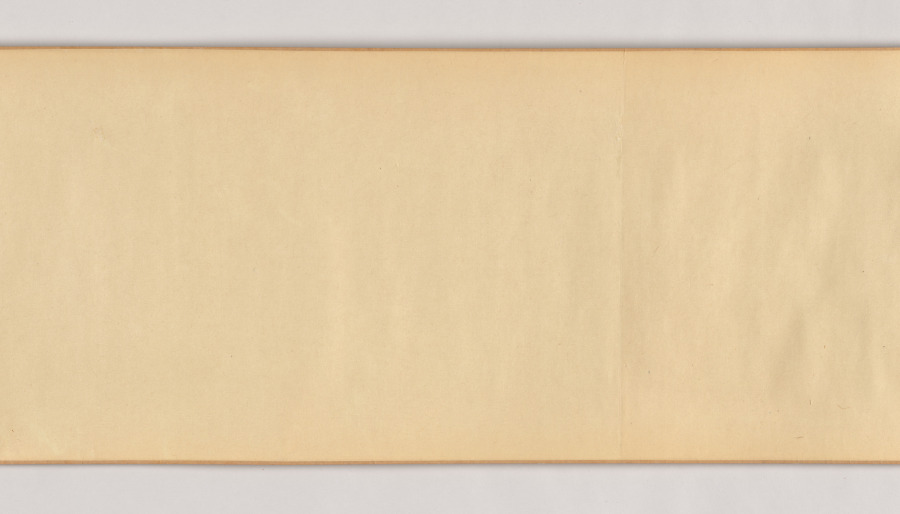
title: Three Horses and Four Grooms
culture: China, Yuan dynasty (1271-1368)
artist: Ren Renfa (Chinese, 1254–1328)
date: c. 1320s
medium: handscroll, ink and color on silk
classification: Painting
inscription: 月山道人. [印] 任氏子明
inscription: 1 colophon and 16 additional seals: 1 poem, 1 colophon dated 1552 or 1612, and 3 seals of Wang Yiying 王一瀛 (1500s); 2 seals of Liang Qingbiao 梁清標 (1620-1691); 6 seals of the Qianlong 乾隆 Emperor (r. 1736-95); 3 seals of the Jiaqing 嘉慶 Emperor (r. 1796-1821); 1 seal of the Xuantong 宣統 Emperor (r. 1908-12); 1 seal of Yu Xiezhong 余協中 (1900s).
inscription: Poem and colophon by Wang Yiying 王一瀛 (1500s): As for painters of horses in the previous dynasty, Surely the name of Yueshan [Ren Renfa] must come first. Under his brush and on his silk, They seem to have just galloped out from the imperial stud. Now as the world overflows with inferiority, Who, from the stable, can recognize a dragon-horse amidst mediocrity. Ren Yueshan [Ren Renfa] of the Yuan Dynasty was best in horse paintings. The three fine steeds he painted in this scroll are so dashing, so vigorous in spirit that they have indeed grasped some of the "brush-idea" of Han Gan. Not long ago this painting came into the possession of Mr. Gui Shanquan, who asked for my inscription. And I, while reading the old manuscripts of Hengshan [Wen Zhengming, 1470-1559], by accident, came cross the poem quoted above. As the ancients said "in painting horses, Master Han was [inspired by and produced] real horses; in composing poems, Master Su [Su Dongpo, the leading Song poet] wrote as if a painting were before him." These are truly what should be considered the two excellences; indeed, they are to be treasured. In the sixth month of the renzi year [either 1552 or 1612]. Jian feng shan ren [The Mountain Dweller of the Sword Peak], Wang Yiying, written in the Qu si ting Pavilion at Chiyang.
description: Ren Renfa's horse images are elegant in appearance and vigorous in spirit. His work attracted not only Chinese scholars but also the Mongols at the imperial court. Inspired by the contemporary scholarly interest in restoring a sense of antiquity in art—an artistic direction led by Zhao Mengfu that exerted a great impact in the Yuan art scene—Ren Renfa, like Zhao Mengfu, modeled his depictions of horses after the Song master Li Gonglin. Another key style component that Ren introduced to this genre was a revival of the Tang classical tradition. The refined color treatment of the horses as seen here was derived from the Tang master Han Gan.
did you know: Only the elegant first horse with a white blaze is accompanied by two grooms, as if its lightning speed required extra supervision.